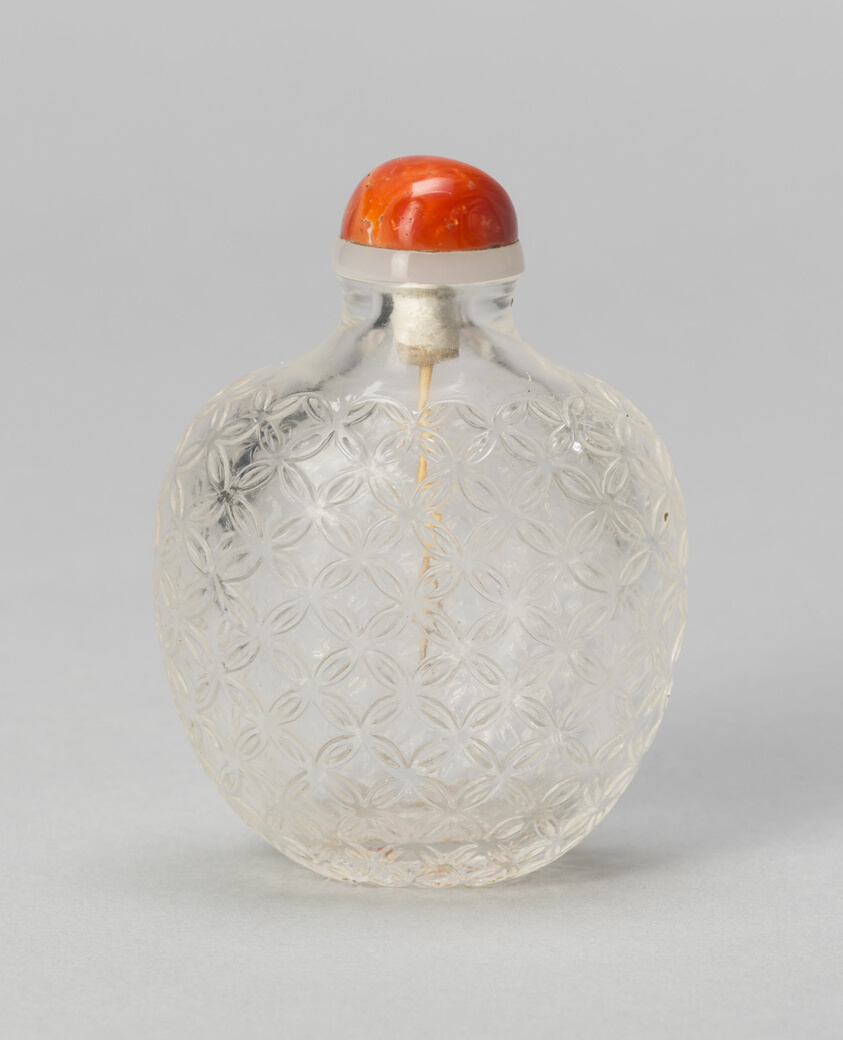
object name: Vessel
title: Snuff Bottle with "Cash" Pattern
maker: China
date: Qing dynasty (1644–1911), 1750–1800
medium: Clear crystal with carved decoration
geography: China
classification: snuff bottle; porcelain; ceramics; asian art; vessel